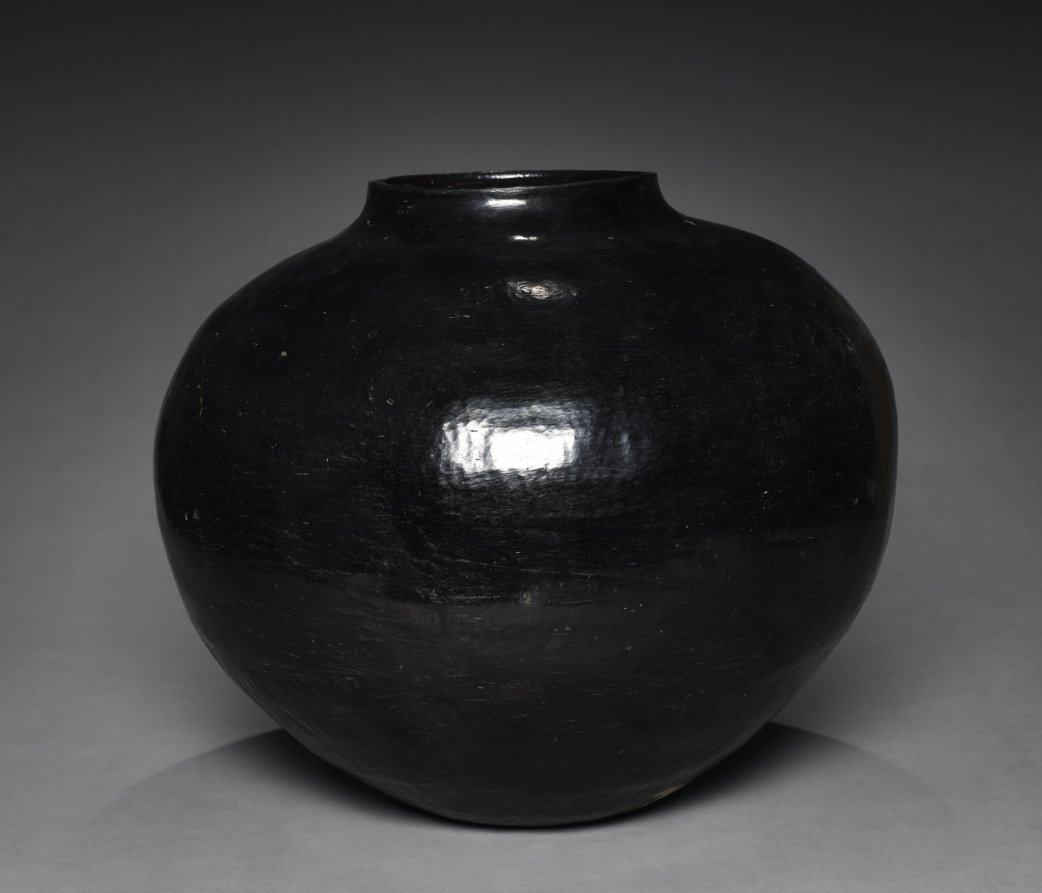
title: Storage Jar, Half- Fanega Size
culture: Southwest, Pueblo, Santa Clara, Post- Contact Period, 19th century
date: 1880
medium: reduction-fired (blackware)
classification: Ceramic